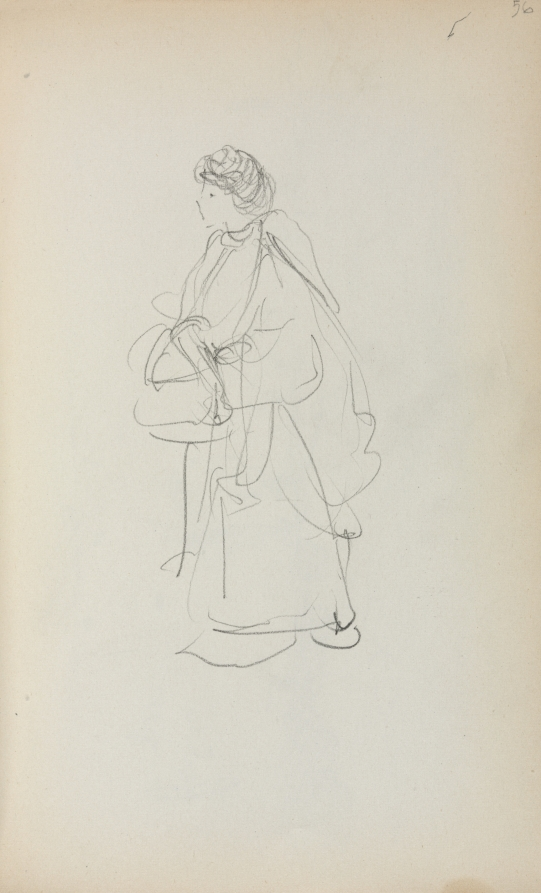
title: Italian Sketchbook: Standing Woman Holding a Satchel (page 56)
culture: America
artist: Maurice Prendergast (American, born Newfoundland [now Canada], 1858–1924)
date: 1898–1899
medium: pencil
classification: Bound Volume